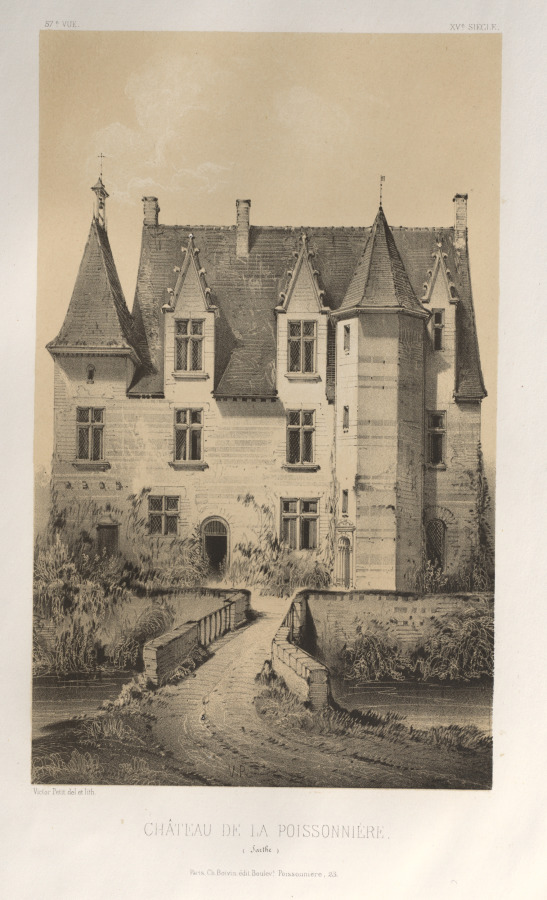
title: Architecture Pittoresque ou Monuments des XVeme. Et XVIeme. Siecles: Chateaux de France des XV et XVI Siecles: Pl. 57, Château De La Poissonnière (Sarthe)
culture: France, 19th century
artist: Victor Petit (French, 1817–1874)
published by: Charles Boivin (publisher and editor); Lith de Godard a Paris (printer)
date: 1860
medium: lithograph with tint stone, from portfolio of 100 lithographs with tint stone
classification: Print